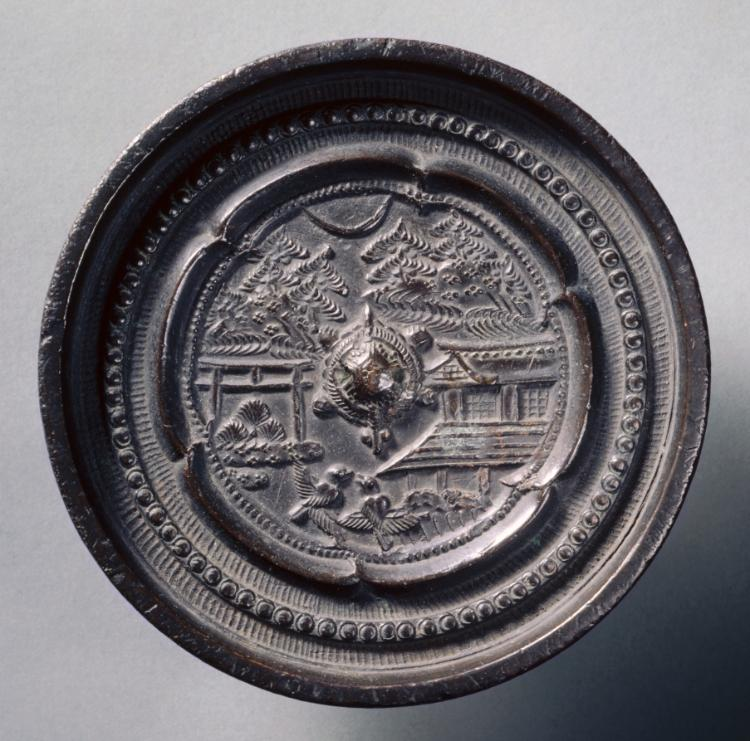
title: Mirror with a Tortoise Knob and Magpies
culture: Japan, Edo period (1615–1868)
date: 1600s to mid-1800s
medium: bronze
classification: Metalwork